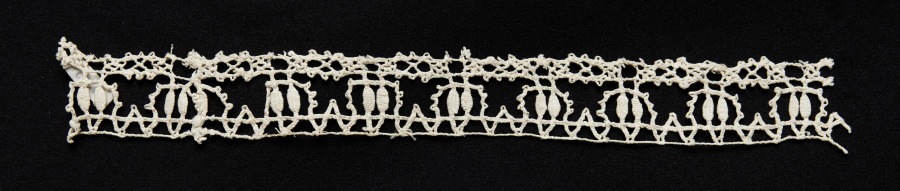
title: Lace Insertion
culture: Italy, Genoa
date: 1550–99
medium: Bobbin lace (needle lace, reticella or punto in aria design)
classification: Lace